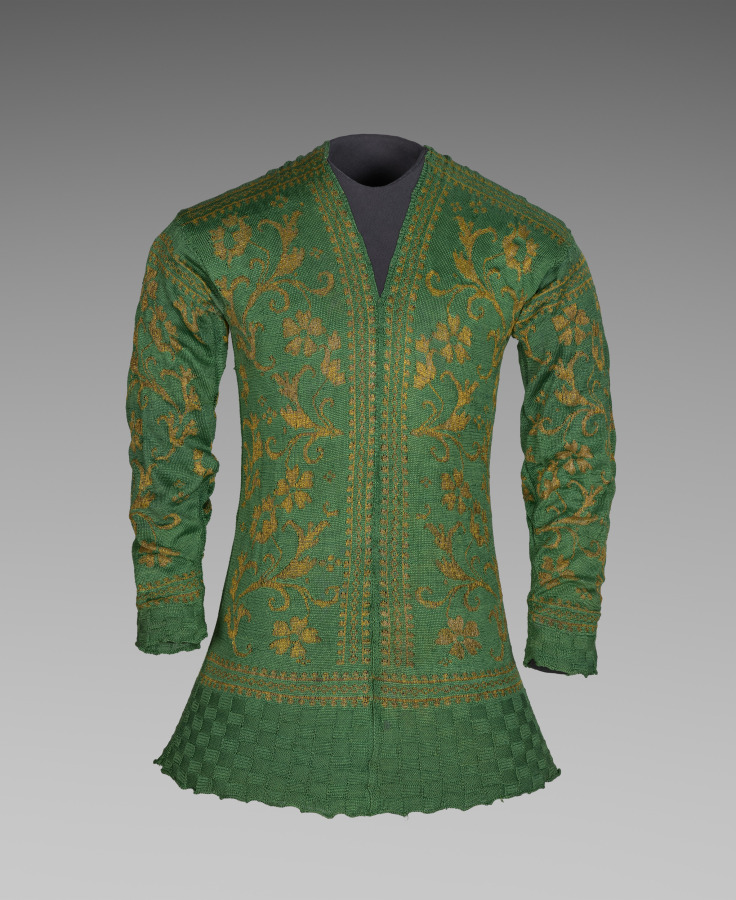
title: Knitted Hunting Jacket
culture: Italy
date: 1600s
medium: knitted silk with gold thread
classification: Garment